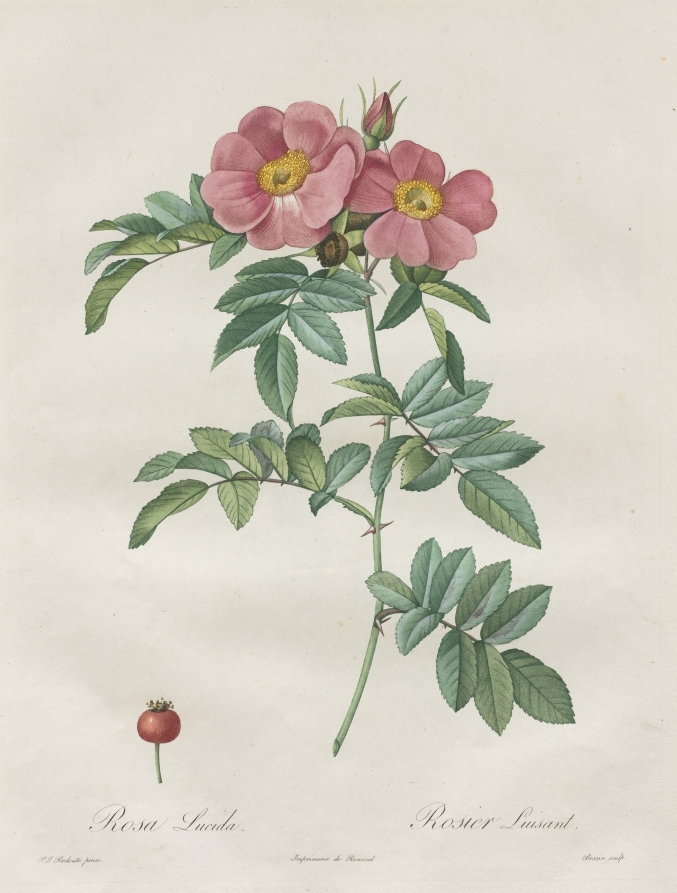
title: Les Roses: Rosa Lucida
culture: France, 19th century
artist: Henri Joseph Redouté (French, 1766–1853)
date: 1817–1824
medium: stipple and line engraving, with hand coloring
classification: Print